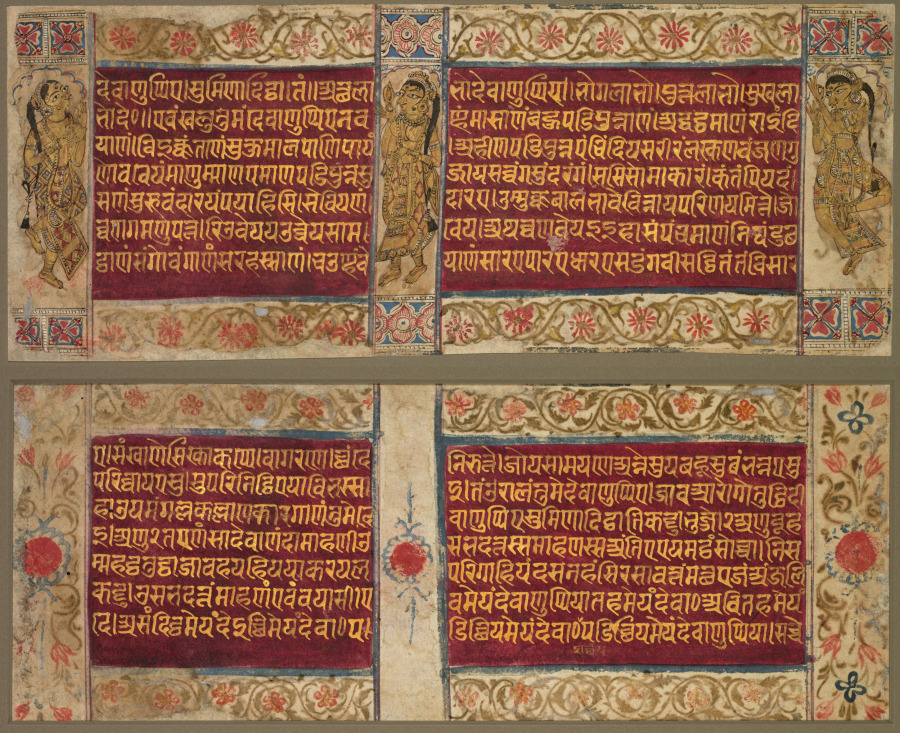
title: Brahman Rishabhadatta's speech, folio 5 from a Kalpa-sutra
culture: Western India, Gujarat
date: c. 1475–1500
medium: gum tempera and gold on paper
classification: Painting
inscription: [[recto, beginning with line 1]] devāṇuppie | sumiṇā diṭṭhā | taṁ || attha lābho devāṇuppie | bhoga lābho | sutta lābho | sukha lā- [line 2] bho de° || evaṁ khalu tumaṁ devāṇuppie navaṇhaṁ māsāṇaṁ bahupaḍipunnāṇaṁ | addh’aṭṭhamāṇaṁ rāïṁdi- [line 3] yāṇaṁ | viïkkaṁtāṇaṁ sukumāla-pāṇi-pāyaṁ | ahīṇa-paḍipunna-paṁc’iṁdiya-sarīraṁ lakkhaṇa-vaṁjaṇa-gu- [line 4] ṇovaveyaṁ māṇ’ummāṇa-pamāṇa-paḍipunna-sujāya-savv’aṁga-suṁdar’aṁga | sasi-somākāraṁ | kaṁtaṁ piyadaṁ | [line 5] saṇaṁ surūvaṁ dārayaṁ payāhisi | se vi ya ṇaṁ dārae | ummukka-bāla-bhāve vinnāya-pariṇaya-mitte | jo- [line 6] vvaṇagam’anupatte | riuveya-yaüvveya-sāma|veya|-atthavvaṇaveya iïhāsaṁ paṁcamāṇaṁ nighaṁṭu-cha- [line 7] ṭṭhāṇaṁ s’aṁgovaṁgāṇaṁ sarahassāṇaṁ | caüṇhaṁ veyāṇaṁ sārae pārae dhārae saḍ’aṁgavī saṭṭhi-taṁtaṁ visāra-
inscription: [[verso, beginning with line 1]] e | saṁkhāṇe sikkhā kappe | vāgaraṇe | cchaṁde nirutte | joyasām=ayaṇe annesu ya bahūsu baṁbhannaesu [line 2] parivvāyaesu | supariniṭṭhie yāvi bha[vi]ssa|i taṁ orālaṁ tume devāṇuppie | jāva ārogge-tuṭṭhidī- [line 3] –hāüya-maṁgalla-kallāṇa-kāragā ṇaṁ tume devāṇuppie sumiṇā diṭṭhā ti kaṭṭu bhujjo 2 aṇuvūha- [line 4] ï | aṇu 2 tae ṇaṁ sā Devāṇaṁdā māhaṇī Usabhadattassa māhaṇassa aṁtie eyam=aṭṭhaṁ soccā | nisa- [line 5] mma haṭṭha-tuṭṭhā jāva haya-hiyayā kara-yala-pariggahiyaṁ dasa-nahaṁ sirasā vattaṁ matthae jaṁ aṁjali [line 6] kaṭṭu | Usabhadattaṁ māhaṇaṁ evaṁ vayāsī | evam=eyaṁ devāṇuppiyā taham=eyaṁ devā° avitaham=eyaṁ [line 7] de | asaṁdiṭṭham=eyaṁ de icchi[ya]m=eyaṁ devā° pa|ḍicchiyam=eyaṁ devā° paḍicchiyam =eyaṁ devāṇuppiyā | sacce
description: Manuscripts of the Kalpa-sutra are sacred embodiments of Jain doctrine. For this reason, they are worthy of beautification, adornment, and celebration by the inhabitants of heaven, such as the celestial dancers under cusped arches on this page. The commissioning of a manuscript is believed to cleanse donors of the karmic effects of past wrongdoing. Wealthy donors gained prestige in the community with the costly production of a sacred manuscript.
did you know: The "further eye" extending beyond the bounds of the face is a characteristic of 15th-century painting.